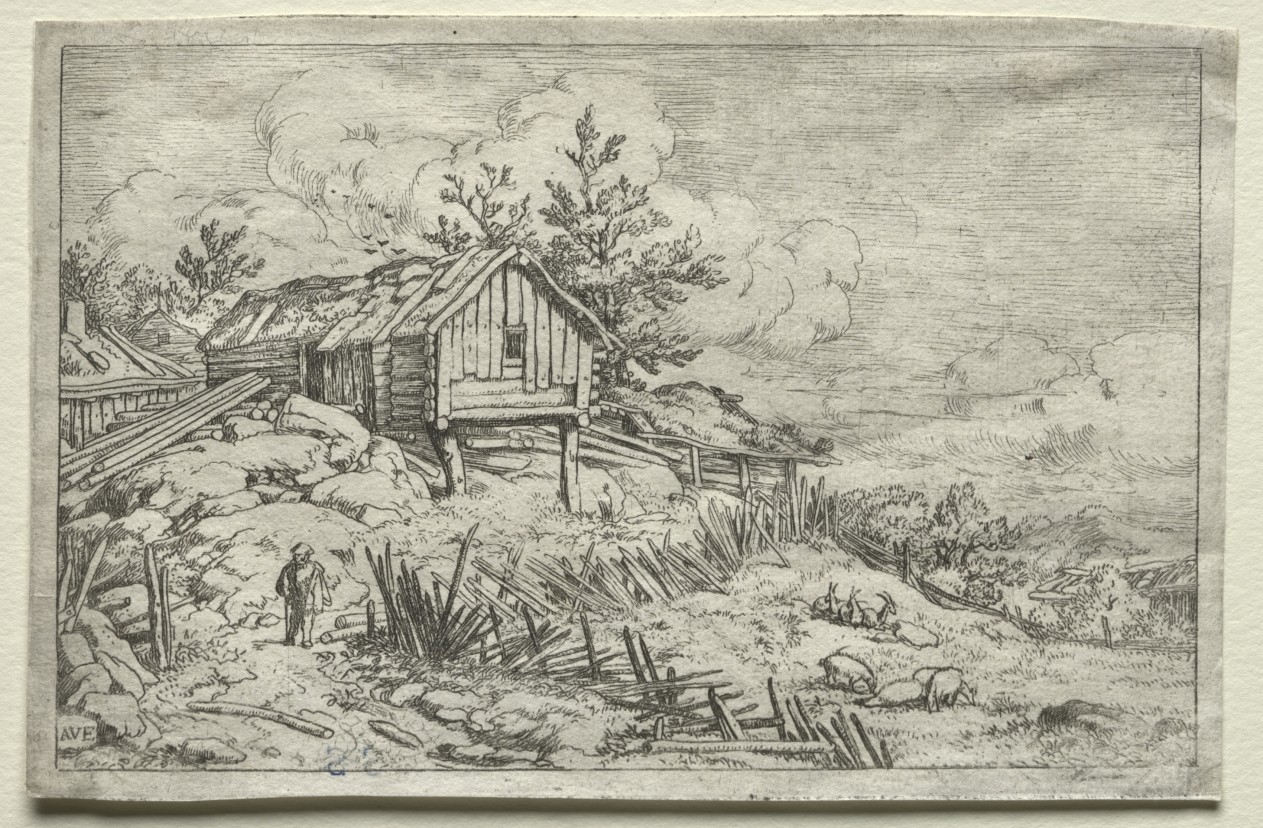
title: Man in Gateway of Deserted House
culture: Netherlands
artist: Allart van Everdingen (Dutch, 1621–1675)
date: 1636–75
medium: etching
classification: Print